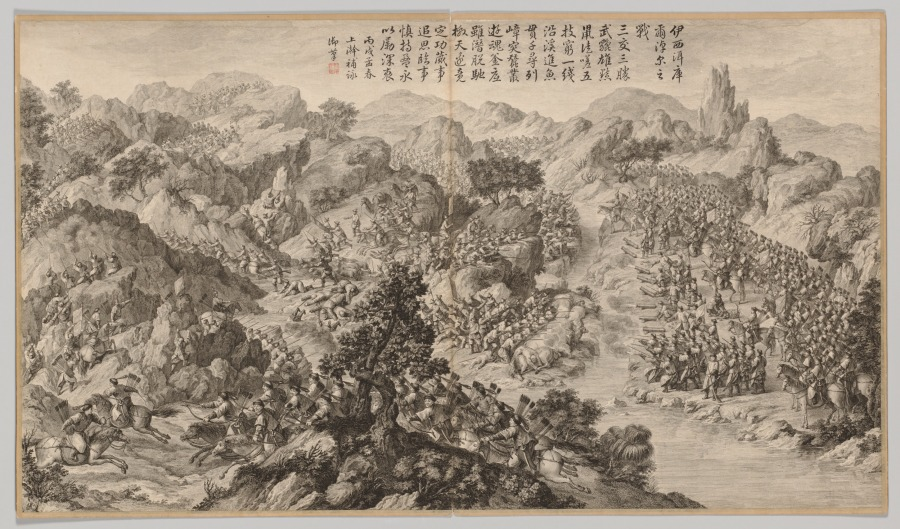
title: Battle at Yixi'er Ku'ernao'er: from Battle Scenes of the Quelling of Rebellions in the Western Regions, with Imperial Poems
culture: China, Qing dynasty (1644–1911), Qianlong reign (1736–95)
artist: Jean Damascene Sallusti (Italian, d. 1781)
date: c. 1765–74; poem dated 1766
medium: etching, mounted in album form, 16 leaves plus two additional leaves of inscriptions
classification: Print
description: This set of etchings was commissioned by Emperor Qianlong to record in pictorial terms the courage of his generals and soldiers in quelling the rebellions in the Western Regions. Qianlong added his own poem to each of the etchings, indicating his appreciation and pride in this demonstration of military might. "Western Regions" refers to the present-day Xingjiang province, often described in Western writing as "Central Asia."